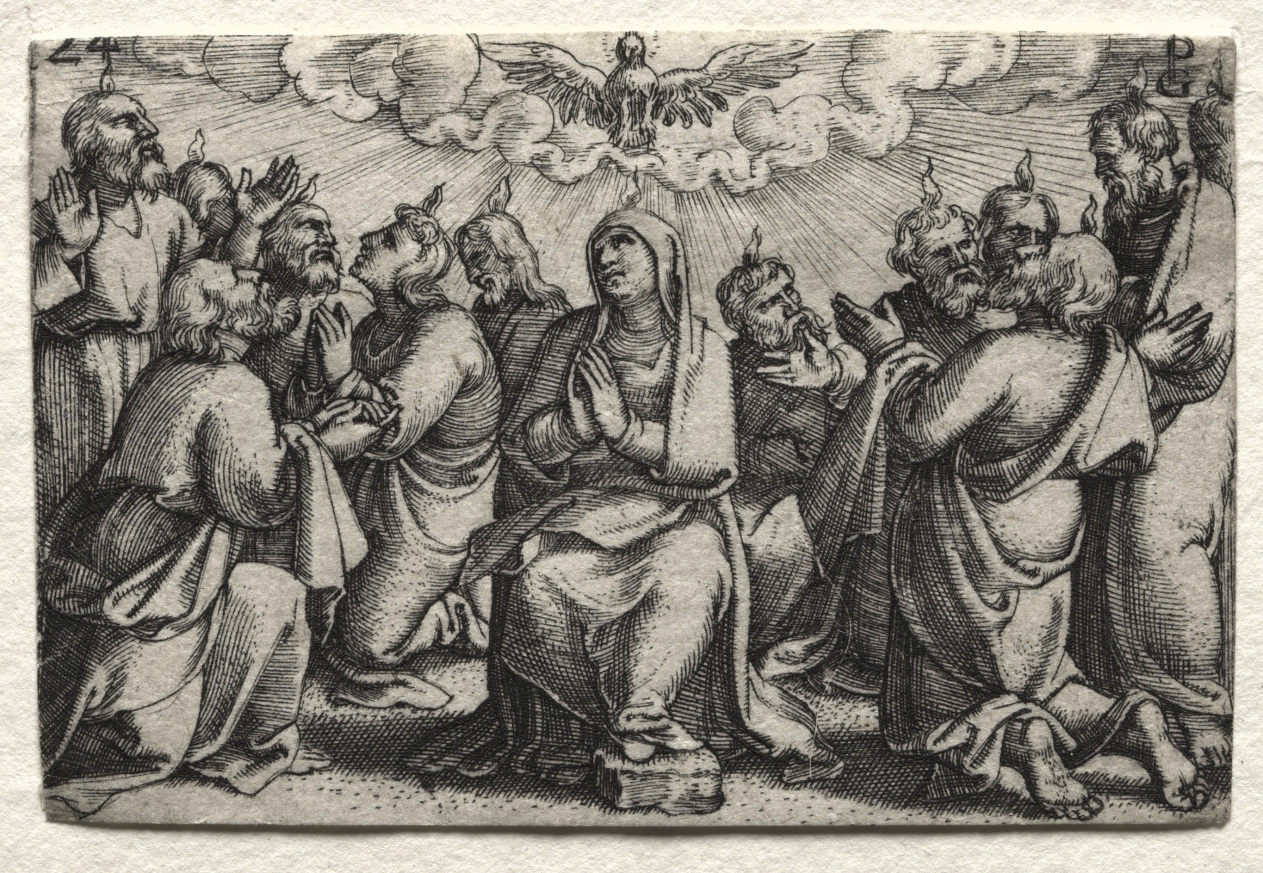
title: The Life of Jesus Christ: The Descent of the Holy Ghost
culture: Germany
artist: Georg Pencz (German, c. 1500–1550)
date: c. 1534–35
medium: engraving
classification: Print